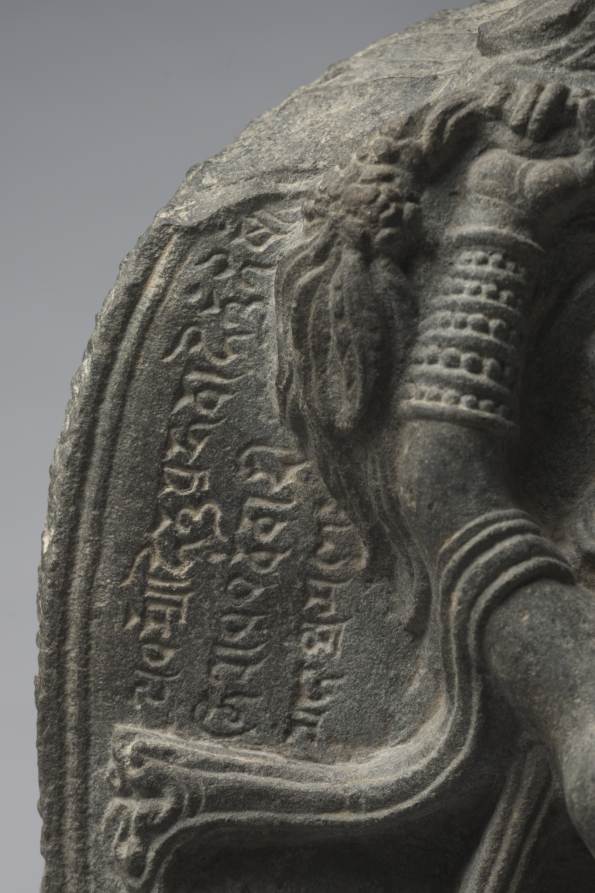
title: Birth of the Buddha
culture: Northeastern India, Bengal, Pala dynasty (730-1197)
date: 800s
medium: Black chlorite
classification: Sculpture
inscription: Phenomena arise from causes;/ The causes have been revealed by the Buddha,/ As have the means for their cessation;/ Thus has been declared by the Great Ascetic.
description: The historical Buddha known as Shakyamuni was born Prince Siddhartha around the end of the 400s BCE near the border of what is today India and Nepal. His mother, Queen Maya, was traveling from her husband’s capital to her family home to give birth, but the baby came early and was born in a grove of shala trees. The miraculous circumstances of his birth are related in a number of textual sources. They state that he emerged from her right side, so Queen Maya here is shown grasping the branch of a tree with her right hand raised, like a nature divinity. The baby was received by Indra, king of the gods, and immediately he took seven steps. The figure at the lower right is Brahma, the Hindu god of creation. In works of Buddhist art, Hindu gods appear as subservient or inferior to the Buddha. The Sanskrit inscription records a common Buddhist prayer of this period: Phenomena arise from causes; The causes have been revealed by the Buddha, As have the means for their cessation; Thus has been declared by the Great Ascetic.